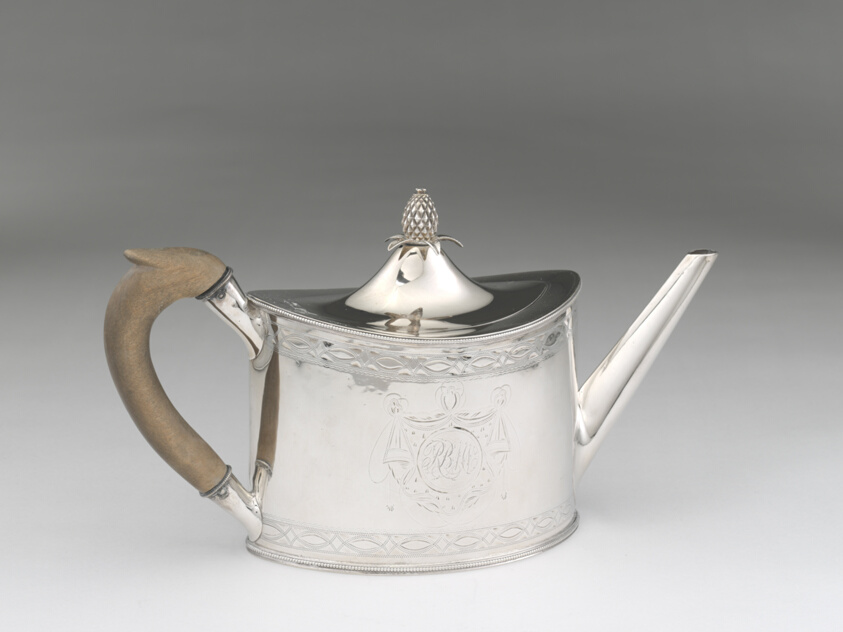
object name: Metalwork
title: Teapot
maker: Daniel Van Voorhis; American, 1751–1824; New York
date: c. 1793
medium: Silver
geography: New York City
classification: teapot; silver; american decorative arts; american arts; decorative arts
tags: dining, drinking